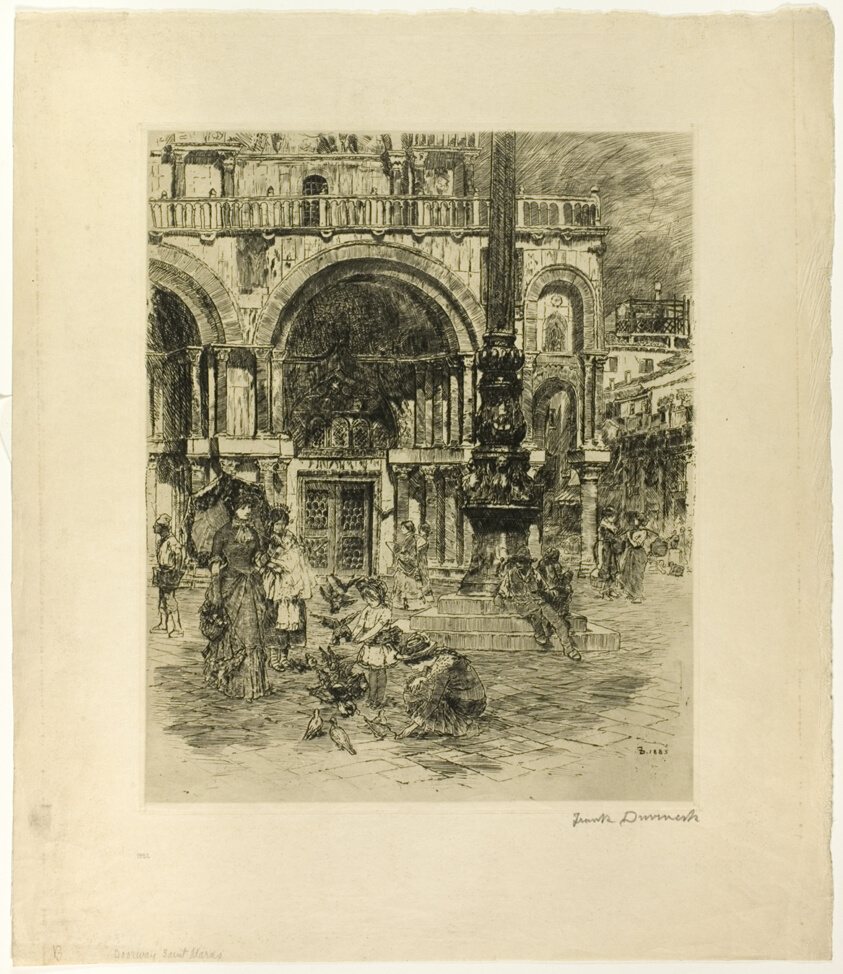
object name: Print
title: Piazza San Marco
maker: Frank Duveneck (American, 1848-1919)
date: 1883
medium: Etching, with drypoint, on cream wove paper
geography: United States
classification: etching; print; prints and drawing